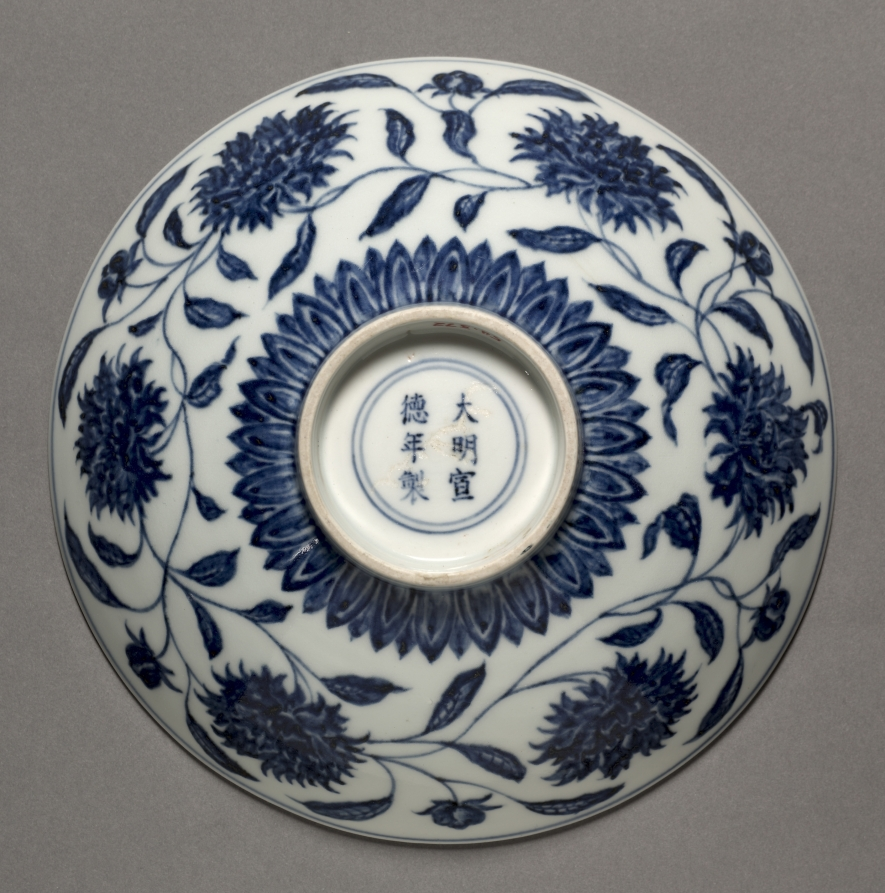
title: Bowl with Peony Decoration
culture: China, Ming dynasty (1368-1644), Xuande mark and reign (1425-1435)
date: 1426–35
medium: porcelain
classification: Ceramic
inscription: 大明宣德年製